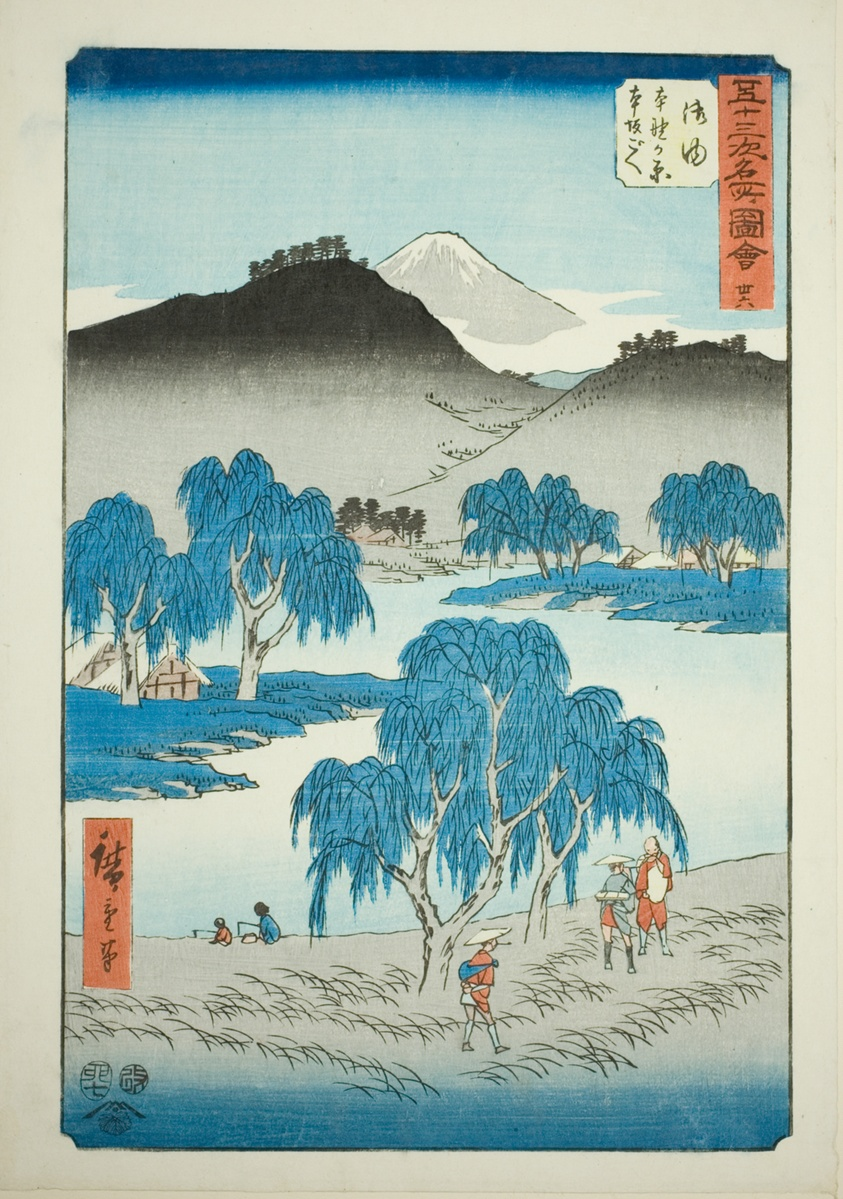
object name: Print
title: Goyu: Motono Plain and Motosaka Pass (Goyu, Motonogahara Motozaka goe), no. 36 from the series "Famous Sights of the Fifty-three Stations (Gojusan tsugi meisho zue)," also known as the Vertical Tokaido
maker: Utagawa Hiroshige 歌川 広重; Japanese, 1797-1858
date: 1855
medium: Color woodblock print; oban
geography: Japan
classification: woodblock print; print; asian art